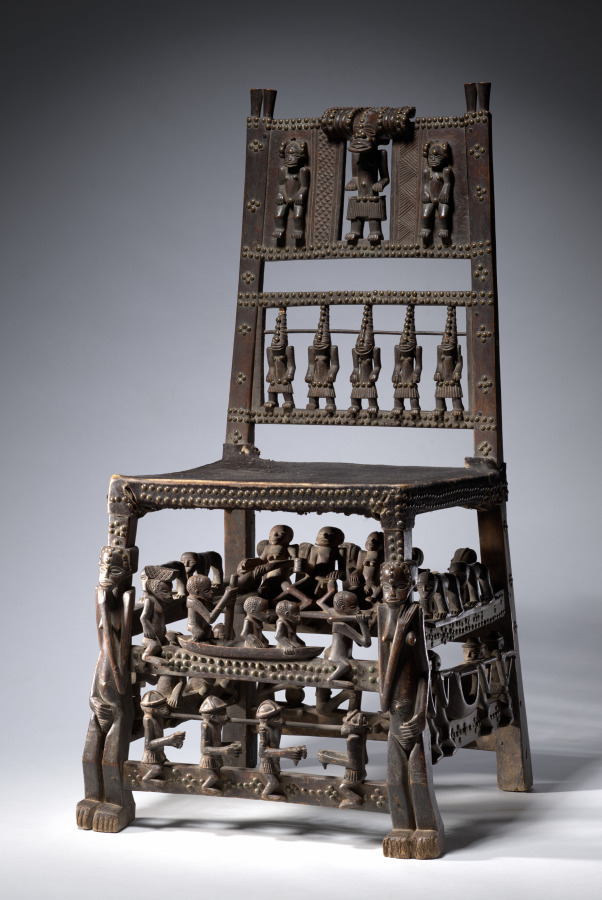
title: Ceremonial Chair or Throne (citwamo ca mangu)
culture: Africa, Central Africa, Angola, Chokwe-style carver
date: 1800s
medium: Wood, upholstery studs, leather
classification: Furniture and woodwork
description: This citwamo ca mangu chair bears over 40 sculpted figures arranged in complex compositions across the chair’s top rail (back), stretchers (rungs), and legs; all symbolize the power of Chokwe supreme chiefs. Such chairs typically bear a dozen or fewer figures. Scenes of royal life and power wrap around the seat, reinforcing how the chief and his family are at the center of their polity and its business.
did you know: Starting around the 1500s, Chokwe and other African leaders and traders received fine chairs as gifts from Portuguese traders. Chokwe leaders adapted this symbol of power as their own, using it in tandem with stools, an earlier kind of prestige seat.